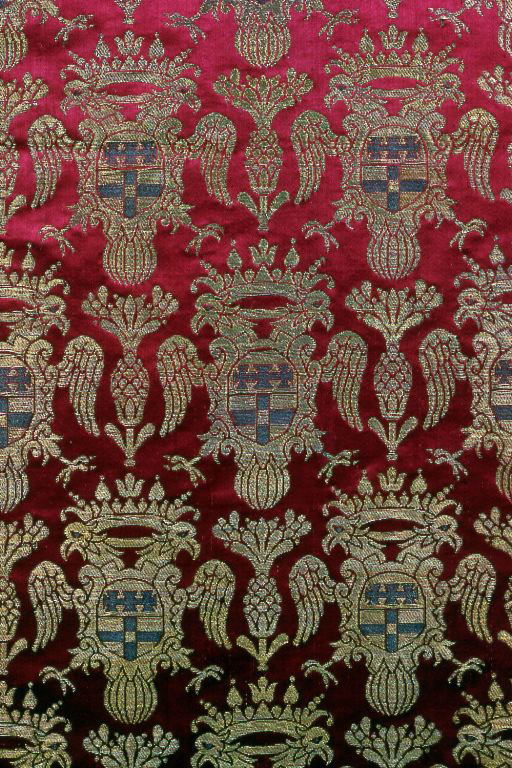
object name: Textile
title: Panel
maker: Italy or Spain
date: 16th/17th century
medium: Silk and gilt strip wound around a silk fiber core, warp-float faced satin weave with supplementary brocading wefts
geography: Italy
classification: textile; weaving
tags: coat of arms, royalty